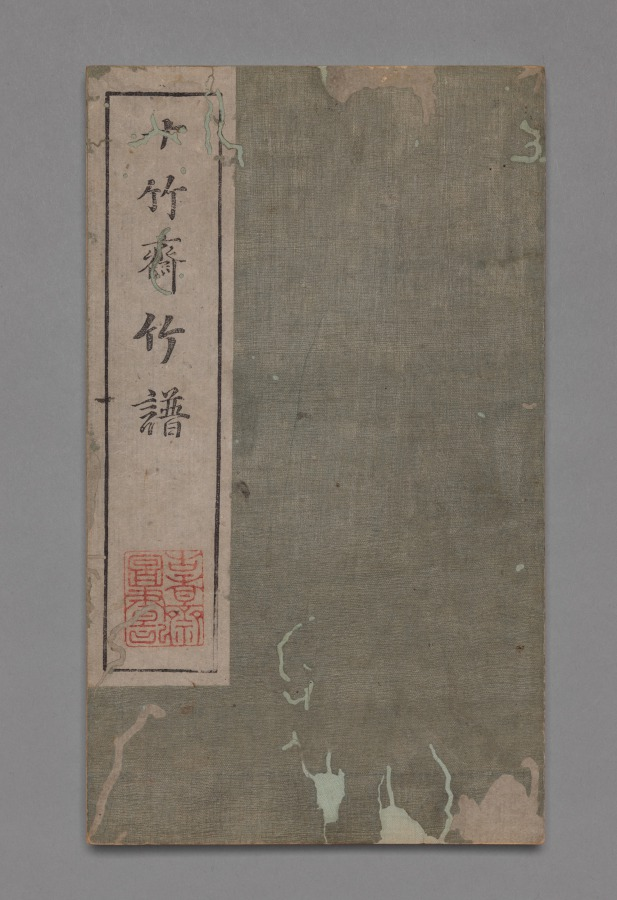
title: Ten Bamboo Studio Painting and Calligraphy Handbook (Shizhuzhai shuhua pu): Bamboo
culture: China, Qing dynasty (1644-1911)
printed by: Hu Zhengyan (Chinese, c. 1584–1674)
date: 1633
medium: Woodblock-printed book; ink and colors on paper; first edition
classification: Print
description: Color printing reached a level of perfection in the early 1600s, as seen in this Ten Bamboo Studio Collection of Calligraphy and Painting and the Mustard Seed Garden Manual of Painting (printed 1679 and 1701). The painterly quality, precision in registering (aligning) the woodblocks, and harmonious colors made them the most successful color print editions in Chinese history. Both editions were printed and compiled in Nanjing, spread nationwide, and had a great impact on the arts in Japan and Korea.